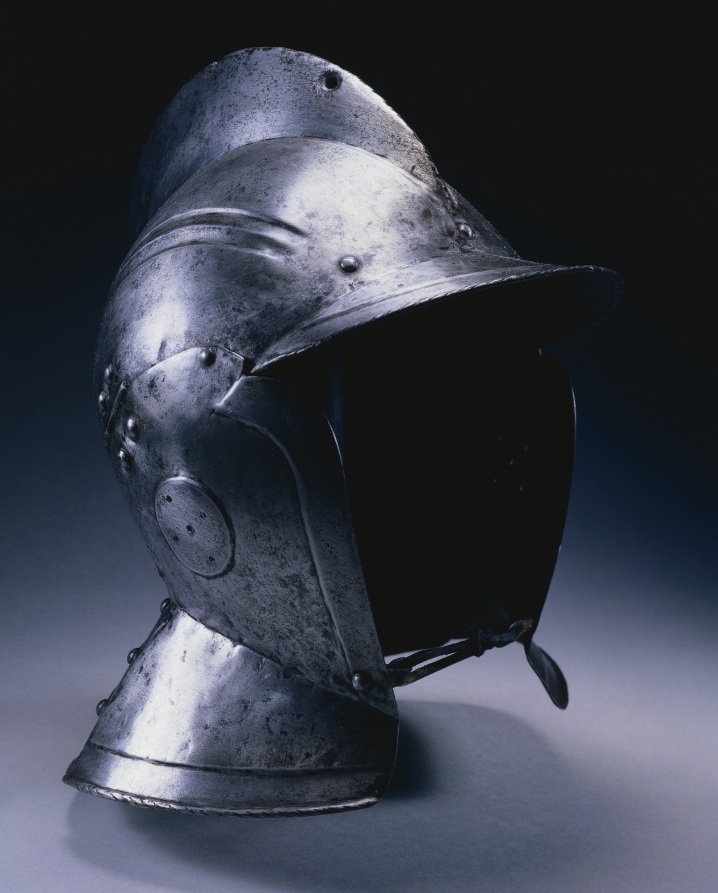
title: Burgonet with Hinged Cheek Pieces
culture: Germany, Nuremberg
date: c. 1540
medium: steel, leather chin strap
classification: Arms and Armor